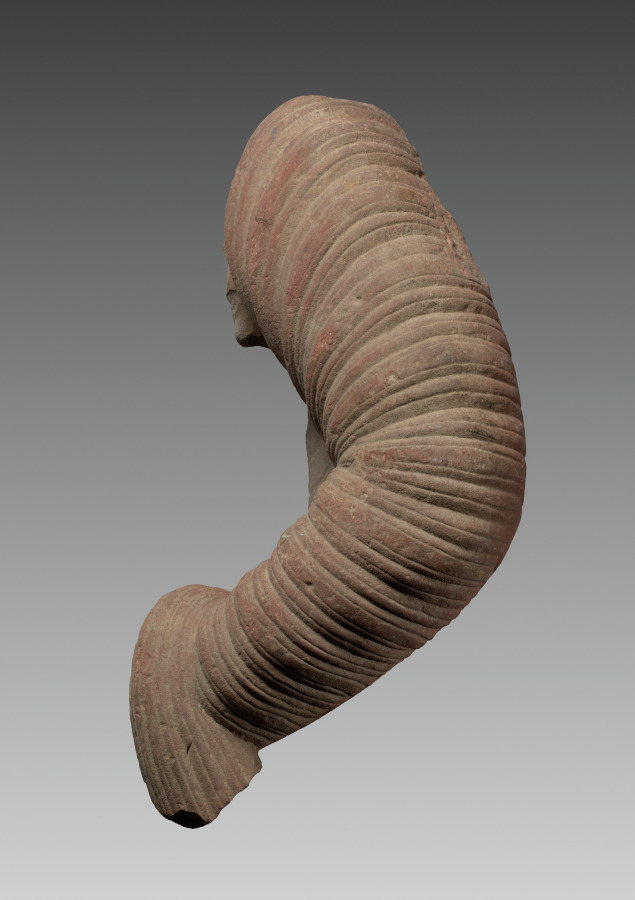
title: Arm of Buddha or Bodhisattva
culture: India, Mathura, Kushan period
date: c. 75–100 CE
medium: stone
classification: Sculpture